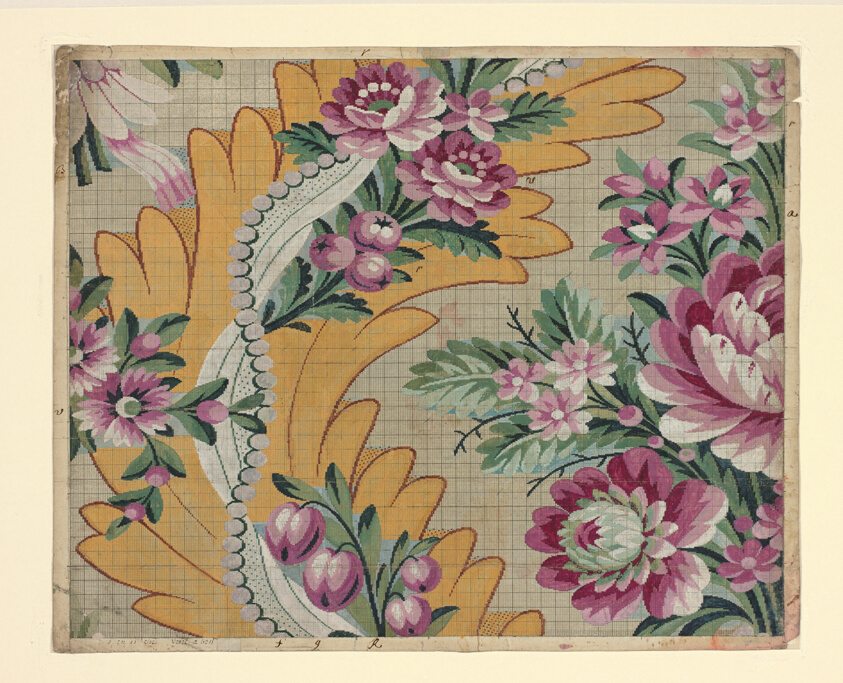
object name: Drawing and Watercolor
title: Mise-en-carte (Point-paper)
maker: Designed by Germain Frères; France, Lyon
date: 1787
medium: Ink and gouache on hand drawn graph paper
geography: France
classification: textile; accessory - paper design